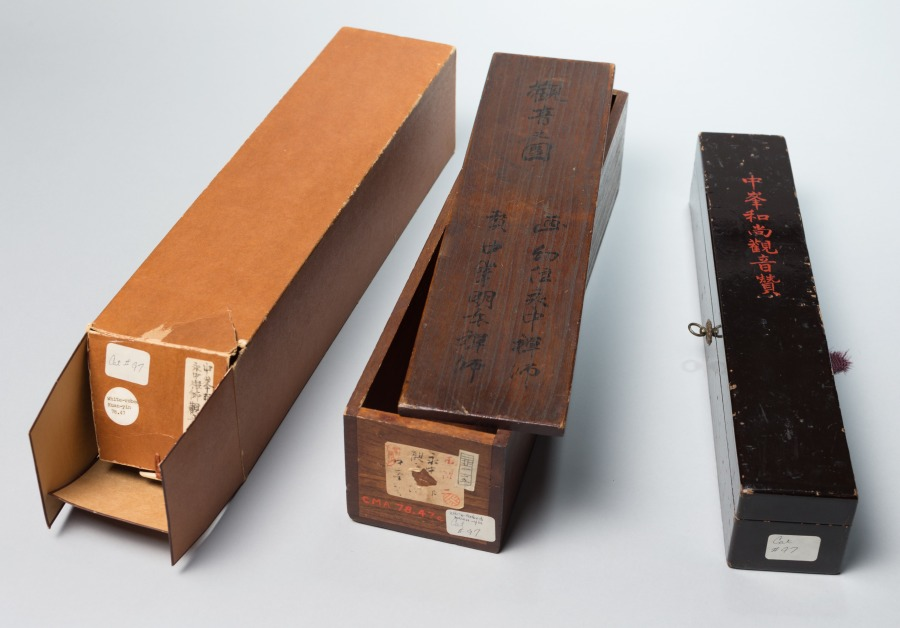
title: White-Robed Guanyin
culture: China, Yuan dynasty (1271-1368)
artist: Jueji Yongzhong (Chinese, active around 1300)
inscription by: Zhongfeng Mingben (Chinese, 1263–1323)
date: late 1200s–early 1300s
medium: hanging scroll; ink on paper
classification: Painting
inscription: Artist's signature: Huanzhu Yongzhong. Inscription by Zhongfeng Mingben: The right thinking [Samkalpa] is embodied within His deep meditation on the Buddha [naga-samadhi]. Retaining not even one single object of thought, A perfect harmony was wonderfully achieved. In the endless time and space, His all-embracing compassion prevails. [signed] Mingben of Huanzhu paying his respects.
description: Guanyin, the bodhisattva of infinite compassion (Avalokiteshvara, in Sanskrit), reveals himself in many forms. According to Buddhist belief, one such manifestation is the white-robed Guanyin sitting on a rock on the island of Putuo (Potalaka, in Sanskrit), located along the coast not far from Ningbo, in Zhejiang Province, China. Here, the figure was swiftly drawn in only a few ink lines. The inscription above is by Zhongfeng Mingben, perhaps the most widely respected and influential Chan (Zen in Japanese) master in the Yuan dynasty. The artist’s signature is a single line below on the left: Huanzhu Yongzhong.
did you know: The CMA collection includes a drawing by a Japanese priest, CMA 1978.47.2, inspired by this composition.